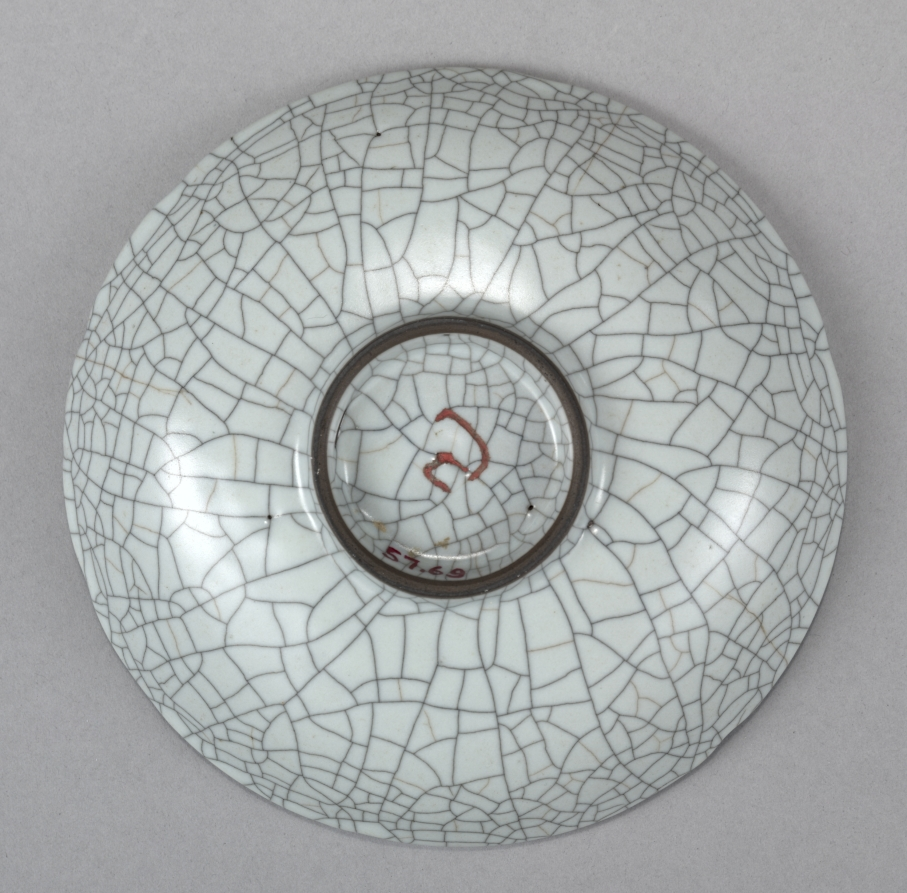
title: Flat Dish: Guan ware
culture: China, Song dynasty (960-1279)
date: 960–1279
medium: glazed reddish-brown stoneware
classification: Ceramic